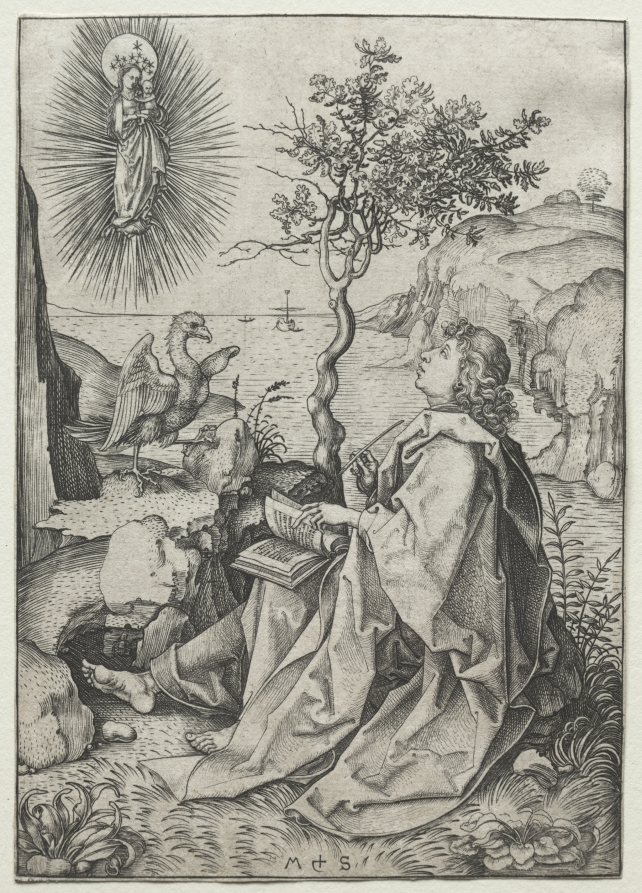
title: St. John the Evangelist on the Isle of Patmos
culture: Germany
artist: Martin Schongauer (German, c. 1450–1491)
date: 1475–80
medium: engraving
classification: Print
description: Christian tradition says that Saint John the evangelist was banished by the Roman Emperor Domitian to the Greek island of Patmos at the end of his life. There, the visionary wrote the Apocalypse, or Book of Revelation. Martin Schongauer's engraving describes in detail one of the visions that the saint experienced. Seated at the seashore, the Virgin Mary miraculously appeared to him, clothed with sun, standing on a crescent moon, and crowned by twelve stars. here, John turns the pages of his book and holds a pen in his right hand, anxious to record what he has just seen. His attribute, the eagle, rests on a rock right before him.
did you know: In the artist's time, St. John the Evangelist was believed to have written the Book of Revelation on the Island of Patmos. Today, many biblical scholars consider John of Patmos a separate author who wrote the text about 90 years after the death of Christ.